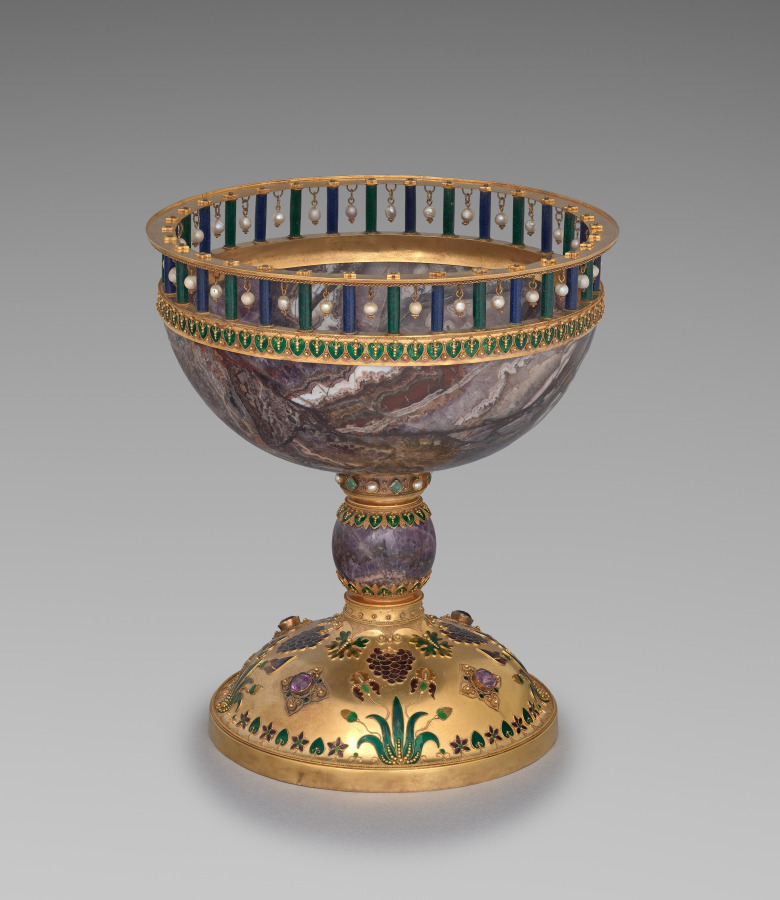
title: Cup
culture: France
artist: Armand Point (French, 1861–1932)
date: c. 1897–99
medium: Gilt copper alloy, cloisonné enamel, amethyst, emerald, ruby, pearls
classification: Metalwork